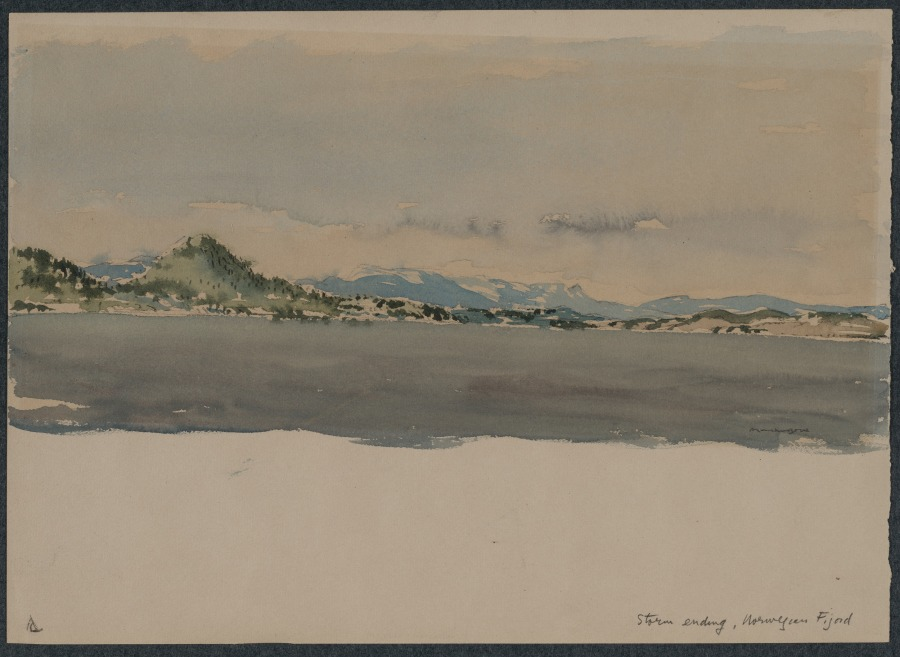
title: Storm Ending, Norwegian Fijord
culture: England, 20th century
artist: Muirhead Bone (British, 1876–1953)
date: c. 1896–1953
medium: watercolor and graphite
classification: Drawing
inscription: Lower right, in graphite: Muirhead Bone